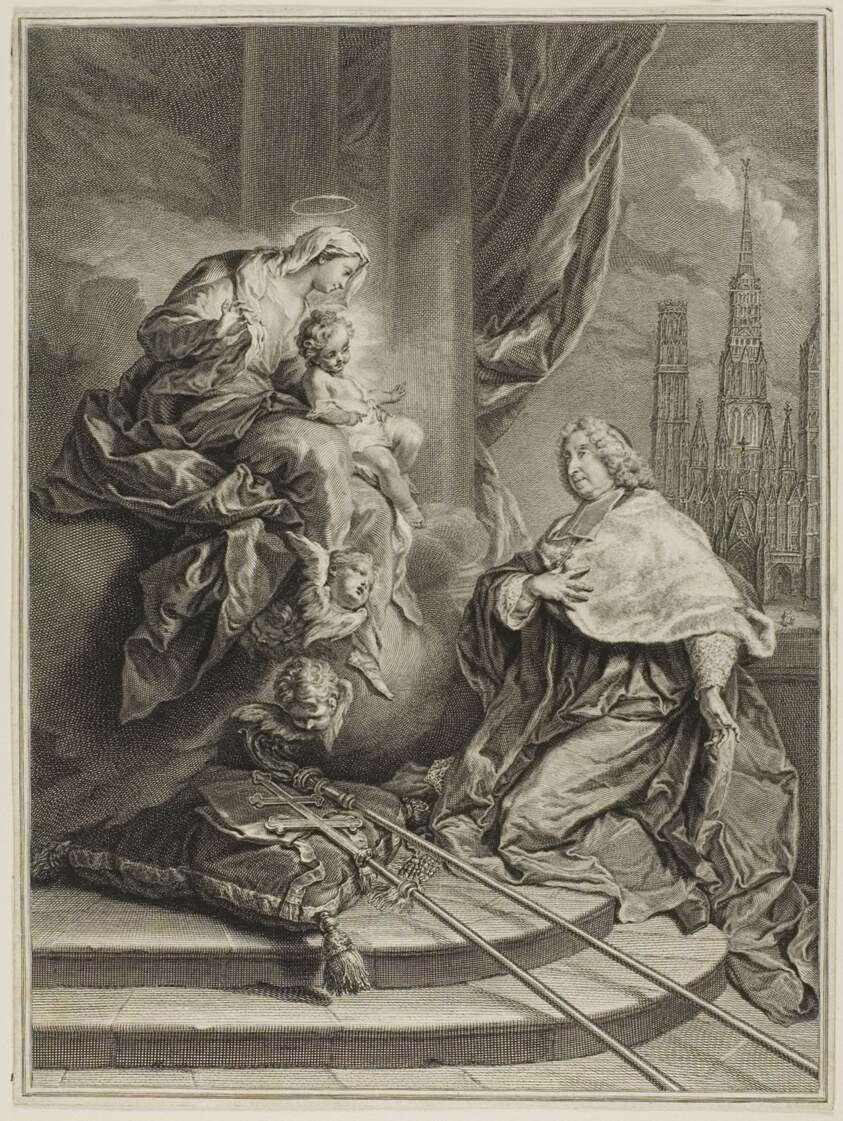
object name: Print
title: Portrait of Louis de la Vergne de Tressan, Count of Lyon, Archbishop of Rouen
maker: Pierre-Imbert Drevet (French, 1697-1739); after Jean-Baptiste van Loo (French, 1684-1745)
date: c. 1728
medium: Engraving on ivory laid paper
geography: France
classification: engraving; print; prints and drawing